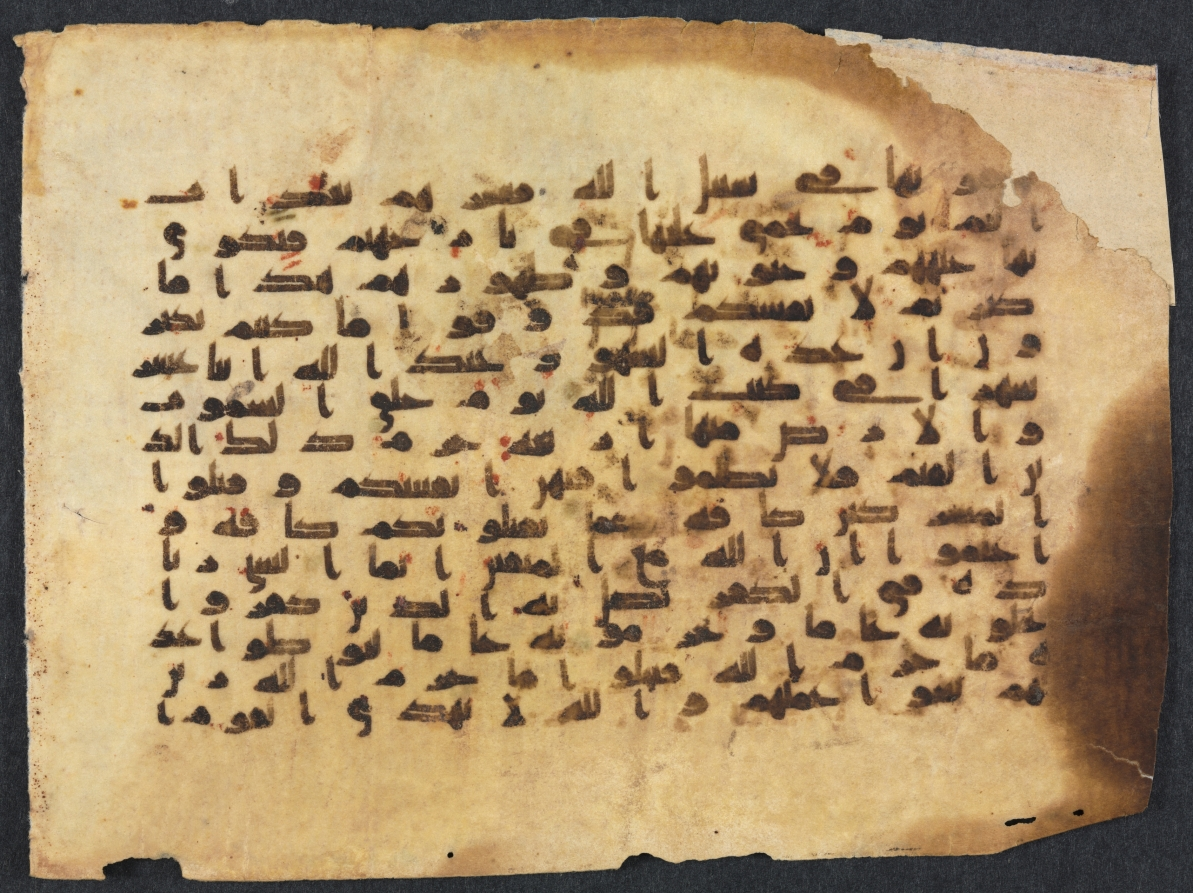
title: Qur'an Manuscript Folio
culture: Egypt?, Abbasid Period, 9th century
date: 800s-900s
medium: ink, gold, and color on parchment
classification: Calligraphy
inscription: Sura Al-Tawba 9: part 33 - part 37. Kufi Script (fourteen lines to a page)